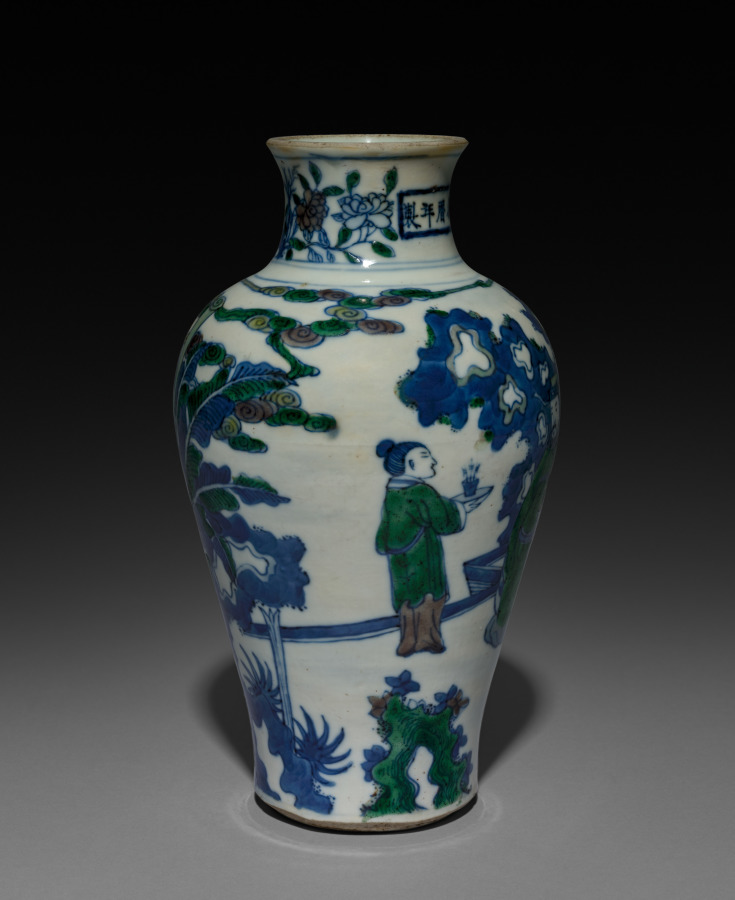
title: Vase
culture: China, Jiangxi province, Jingdezhen kilns, Ming dynasty (1368-1644), Wanli reign (1572-1620)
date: 1573–1620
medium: porcelain with underglaze blue decoration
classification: Ceramic